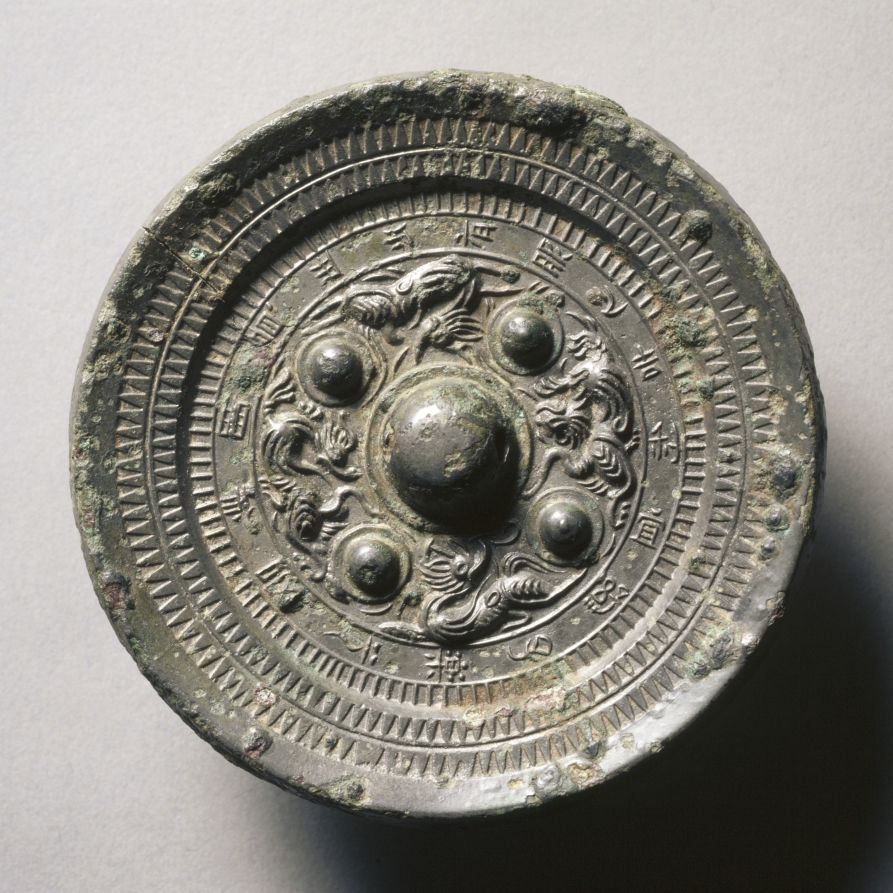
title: Mirror with Four Qilin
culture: China, Eastern Han dynasty (25–220 CE)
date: early 100s–early 200s CE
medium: bronze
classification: Metalwork